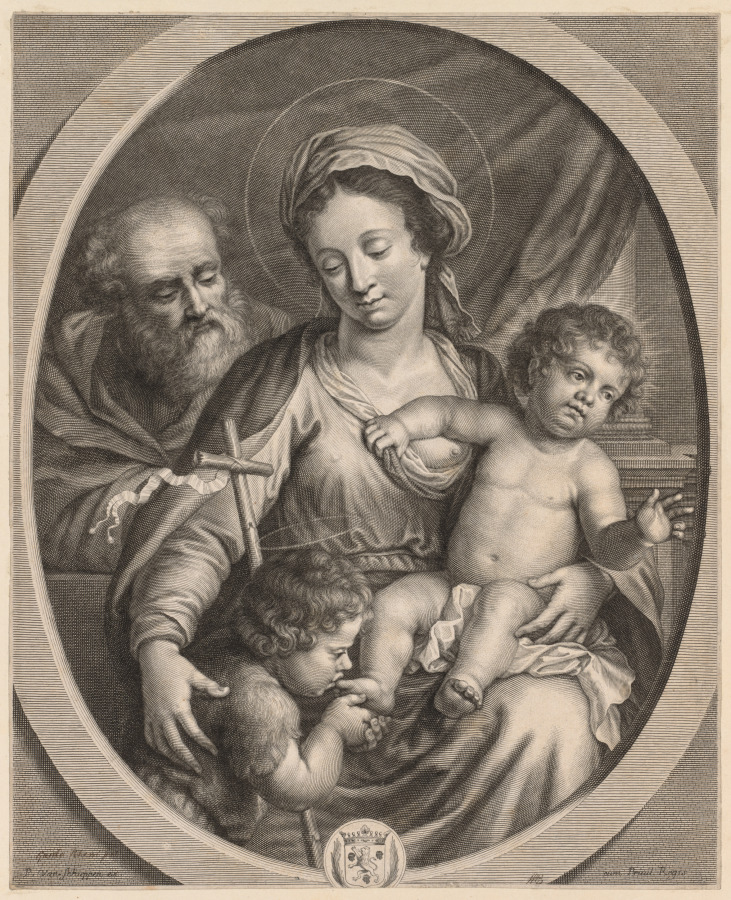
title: Holy Family and S. John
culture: Flanders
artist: Pierre Louis van Schuppen (Flemish, 1627–1702)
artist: after Guido Reni (Italian, 1575–1642)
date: 1650–1700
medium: engraving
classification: Print